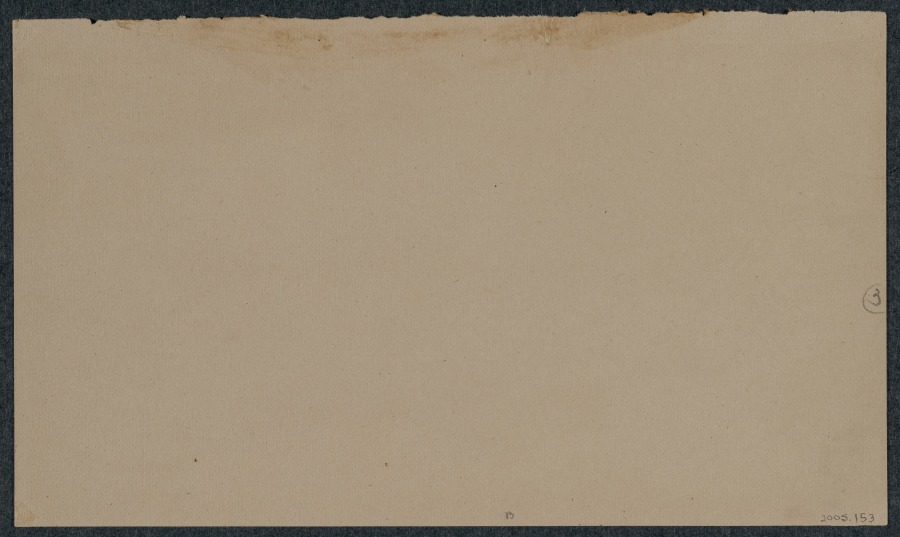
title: Entering Bergen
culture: England, 20th century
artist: Muirhead Bone (British, 1876–1953)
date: c. 1896–1953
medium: watercolor and graphite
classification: Drawing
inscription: Lower right, in graphite: M. Bone